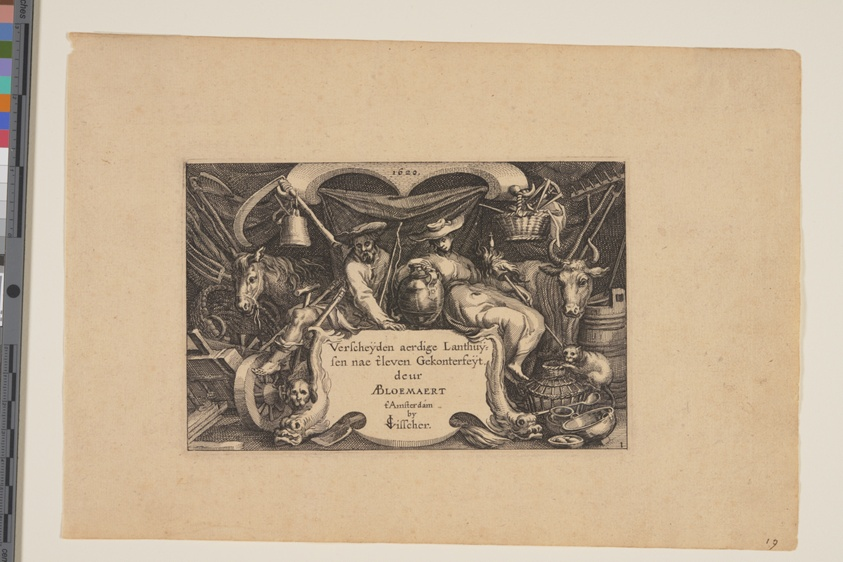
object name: Print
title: Title-page, from Landscapes (Verscheyden aerdige Lanthuysen...)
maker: Claes Jansz. Visscher (Netherlandish, c. 1550–c. 1612); after Abraham Bloemaert (Dutch, 1566–1651)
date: 1620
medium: Etching on ivory laid paper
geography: Netherlands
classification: print; paper; prints and drawing; etching